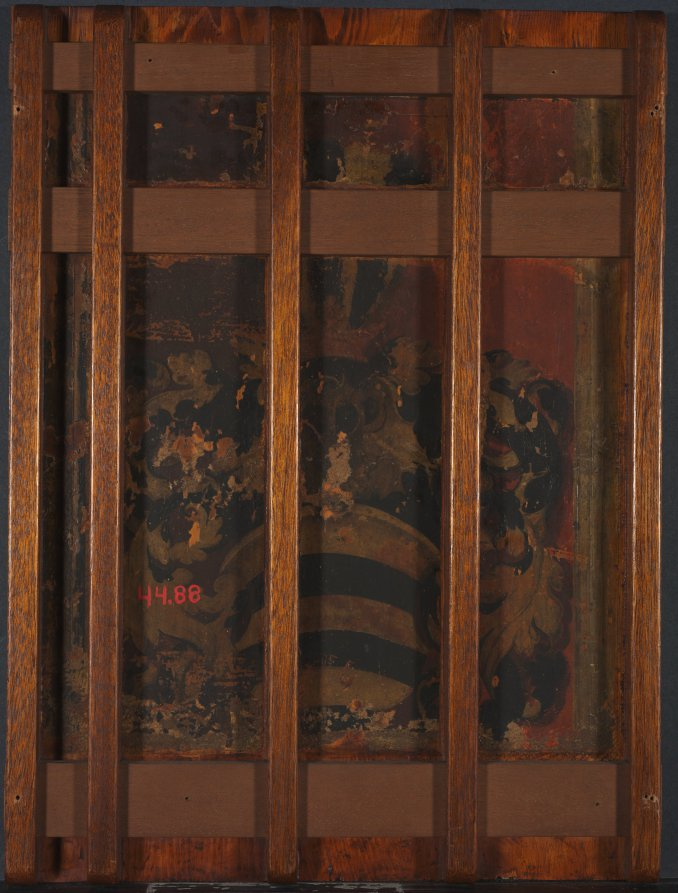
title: Portrait of Maria Kitscher, Frau von Freyberg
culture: Germany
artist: Hans Mielich (German, 1516–1573)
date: 1545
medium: oil on wood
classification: Painting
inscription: Signed upper left: "M.D. XXXXV. / AETATIS SUAE XXVII. / .H.M."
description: Maria von Freyberg was in the court of Albert V, Duke of Bavaria. However, as Lutherans, the family eventually fell from favor as Catholic political interests consolidated power in Bavaria. Mielich’s work for the Munich court included illustrating an inventory of the duchess’s jewelry, seen in the meticulous attention here to the sitter’s brooches, necklaces, and rings. The diamond and ruby ring on her left index finger would have slid apart to reveal a private message or image underneath the gems.